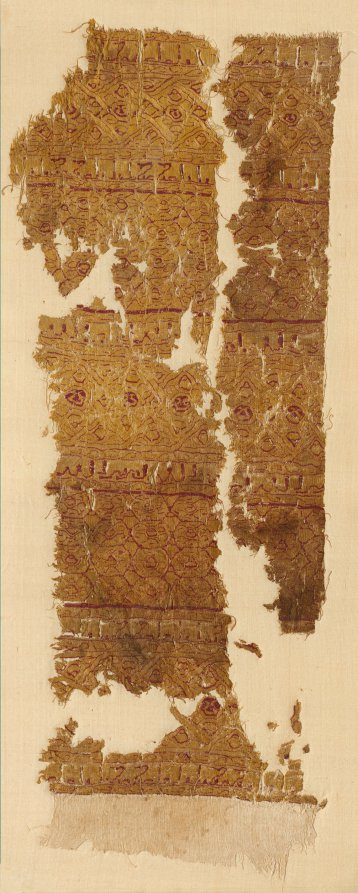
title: Tiraz with dense guilloche bands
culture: Egypt, Fatimid period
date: 1100s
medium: plain weave with inwoven tapestry weave: linen and silk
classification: Textile